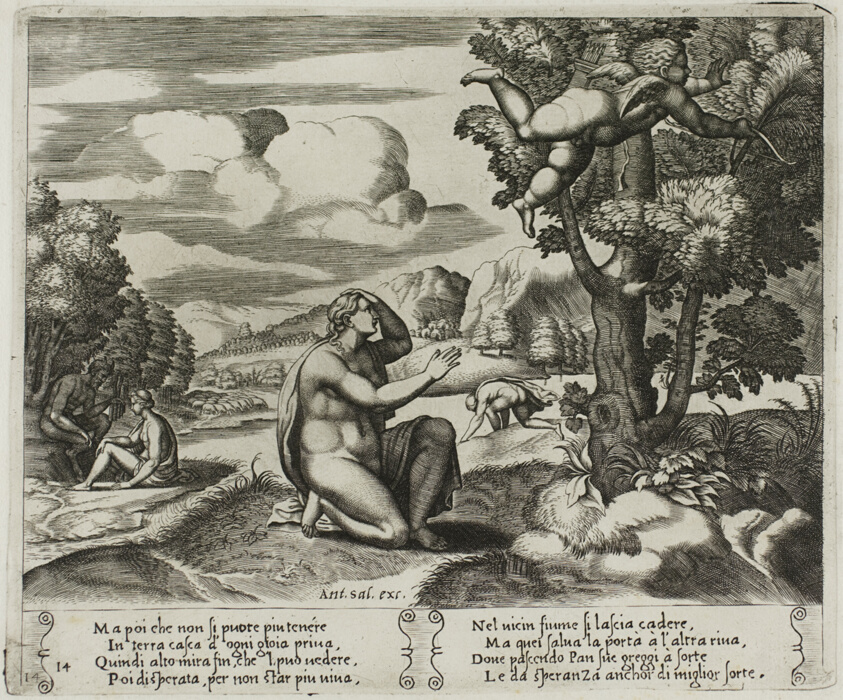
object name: Print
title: Cupid Fleeing from Psyche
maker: Master of the Die (Italian, active c. 1530-1560); after Michiel Coxcie I (Flemish, 1499-1592); in turn, inspired by Raffaello Sanzio, called Raphael (Italian, 1483-1520)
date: 1530/40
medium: Engraving in warm brown ink on cream laid paper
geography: Italy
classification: engraving; print; prints and drawing